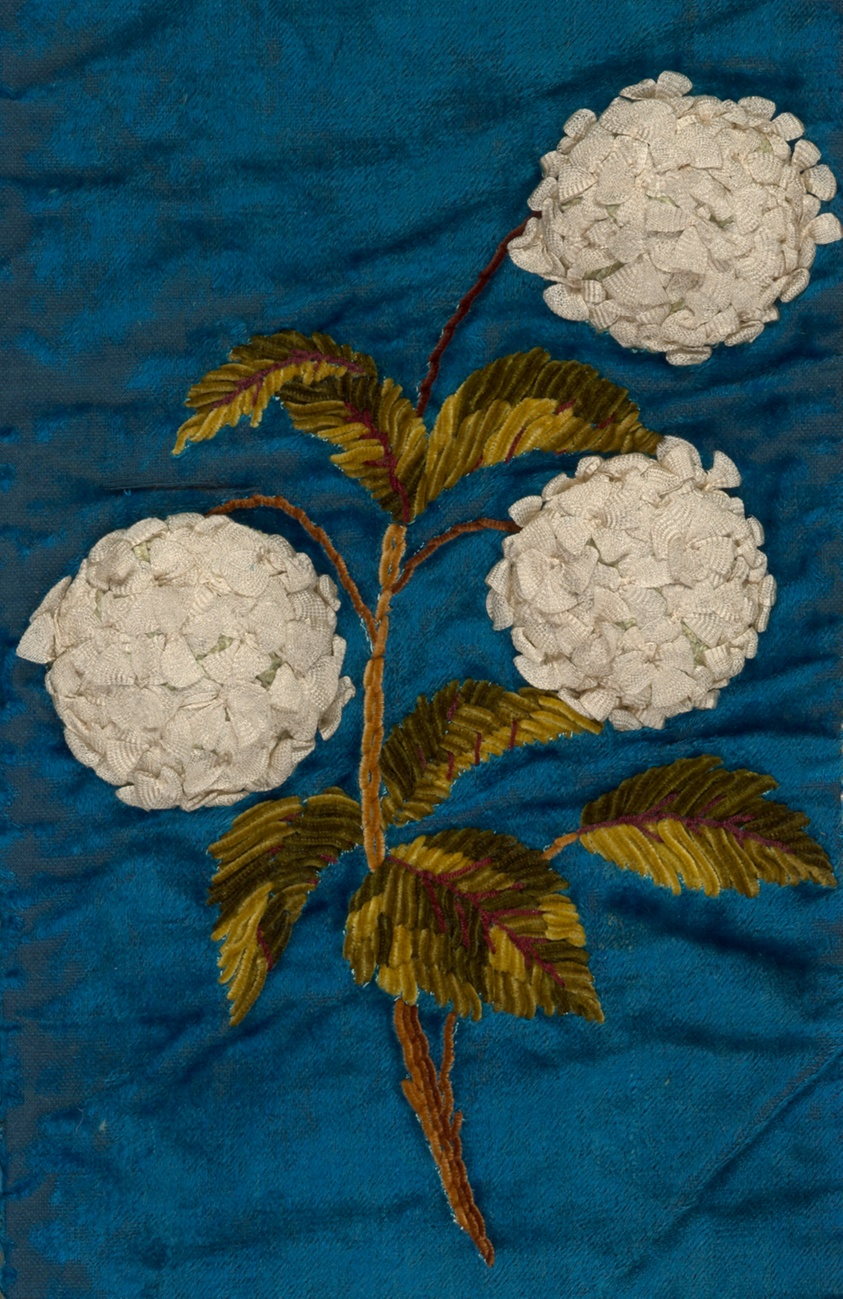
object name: Textile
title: Parlor Throw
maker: American, possibly Illinois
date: c. 1890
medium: Pieced, embroidered and painted “crazy” quilt; dyed and printed silk plain, satin, pile and patterned weave fabrics and ribbons; silk and metallic embroidery threads; paint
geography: Illinois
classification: needlework - quilt; textile